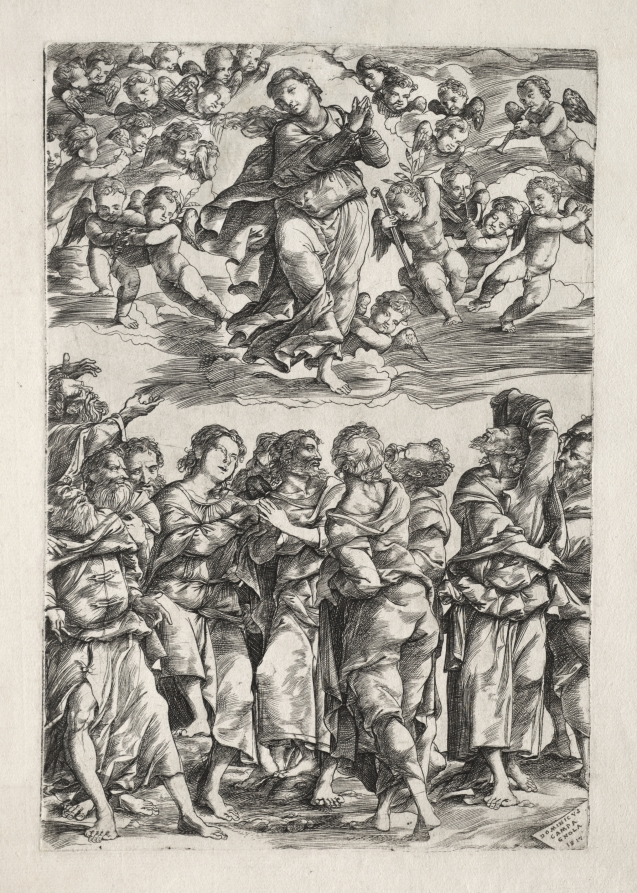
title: The Assumption of the Virgin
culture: Italy, 16th century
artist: Domenico Campagnola (Italian, 1500–1564)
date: 1517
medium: engraving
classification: Print